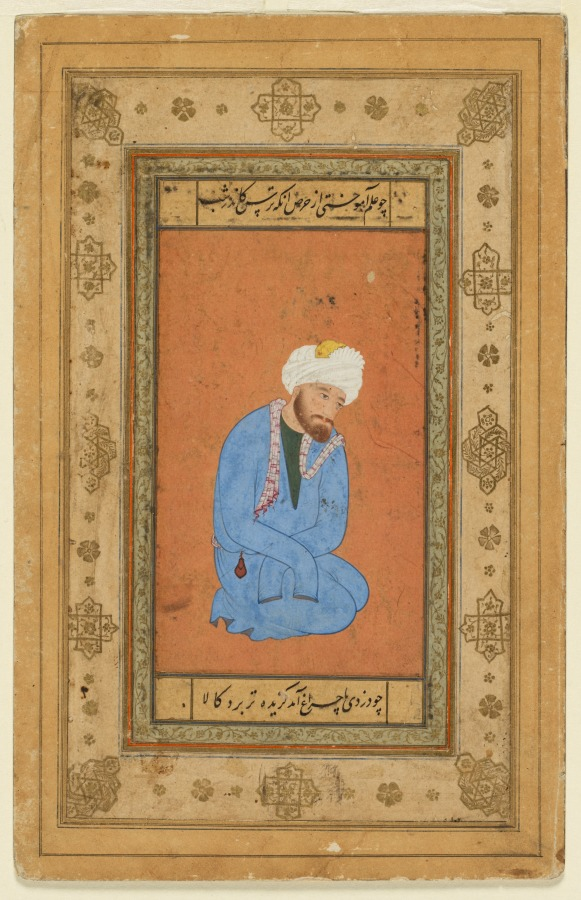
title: Portrait of a kneeling holy man, from the Prince Salim Album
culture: Mughal India, court of Akbar (reigned 1556–1605)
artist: attributed to Mir Sayyid Ali (Persian, active in Iran 1540s–50, active in India 1555–1580)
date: c. 1556–60; border c. 1602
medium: Gum tempera, ink, and gold on paper, laid down on an album page with cream borders decorated with gold flowers and geometric motifs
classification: Painting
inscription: [[verso, upper left corner]] 6212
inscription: [[verso, upper left corner]] 20.865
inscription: [[verso, upper center, below crossed out words and circled]] red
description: The kneeling figure is a charlatan holy man who wears the blue robe of a Sufi mystic. According to the inscriptions above and below the painting, he acts humble and pious for monetary gain rather than sincerity of devotion. Images of charlatan holy men recur in Mughal painting, including in the Cleveland Tuti-Nama. Mir Sayyid Ali was the first head of the Mughal workshop under Akbar. He was responsible for training Indian artists to adopt Persian sensibilities, admired by elites of the Islamic world during the 1400s to at least the 1700s.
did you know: In this sensitive portrayal of a charlatan holy man, the eyes are pale and empty.